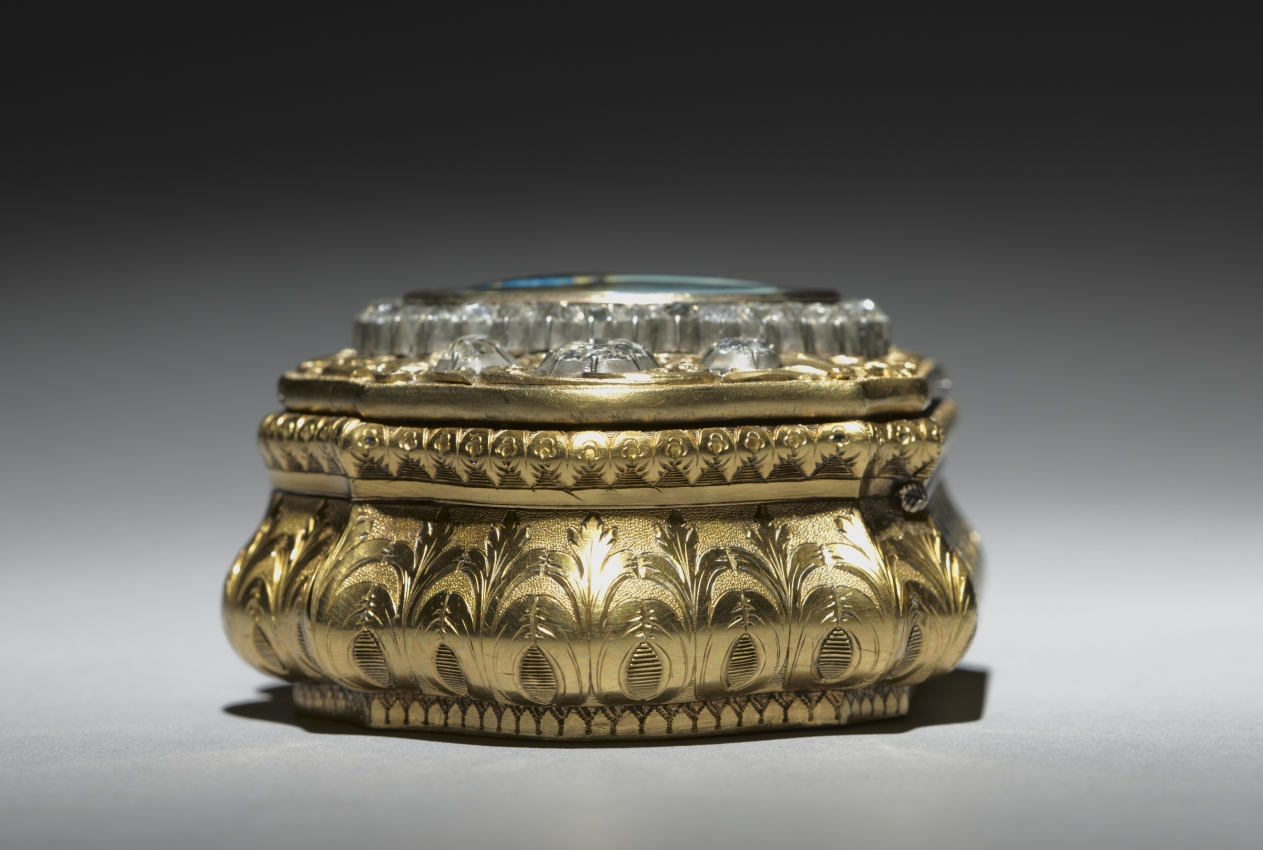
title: Box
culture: Switzerland, Neufchatel, 19th century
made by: Goffert (Russian)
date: c. 1850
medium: gold set with diamonds around a miniature of Tsar Alexander III (1845-1894)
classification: Miscellaneous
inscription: miniature signed in Russian: " " (Goffert).